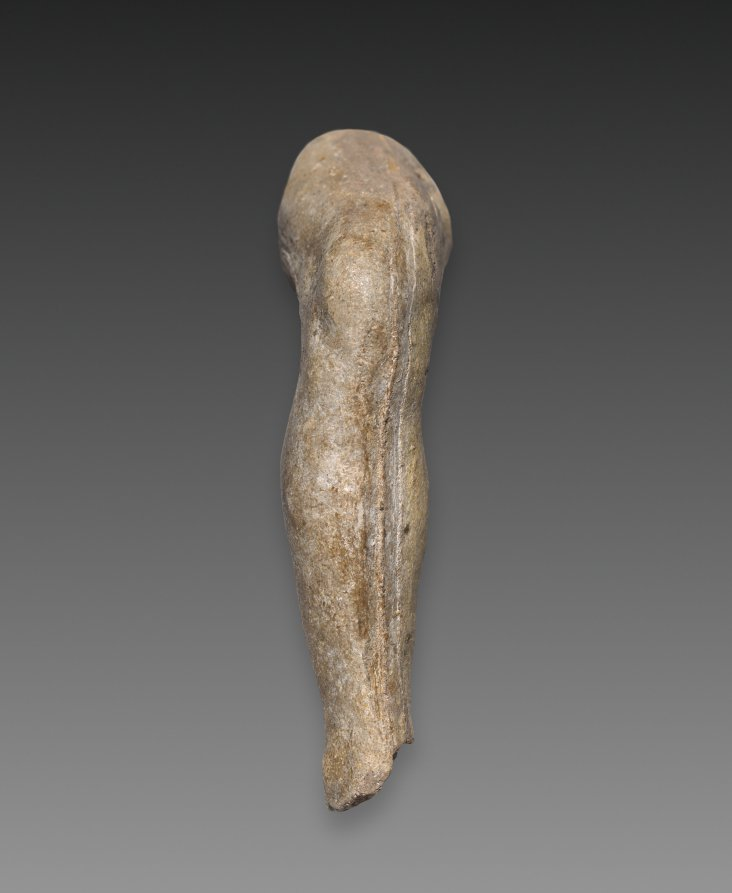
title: Fragment of a Leg (right leg)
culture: France, late 19th-early 20th Century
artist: Auguste Rodin (French, 1840–1917)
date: c. 1880 – 1917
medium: plaster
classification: Sculpture